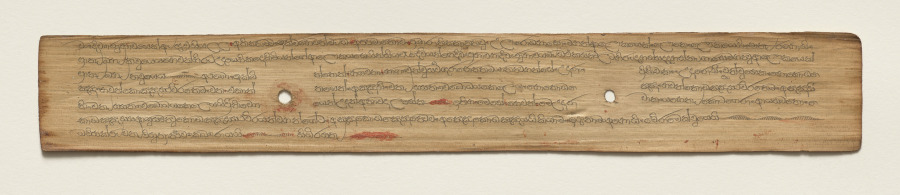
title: Leaf from a Buddhist Manuscript (verso)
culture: Sri Lanka, Singhalese, Late 17th century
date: c. 1700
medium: fiber paper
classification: Manuscript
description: Palm leaf material is still used for manuscripts in Sri Lanka. The palm leaves are prepared first by boiling them, drying them in the sun, and then rubbing them with oils. Scribes then use a metal stylus to incise the text. Then charcoal powder is wiped across the pages, filling in only the inscribed lines.